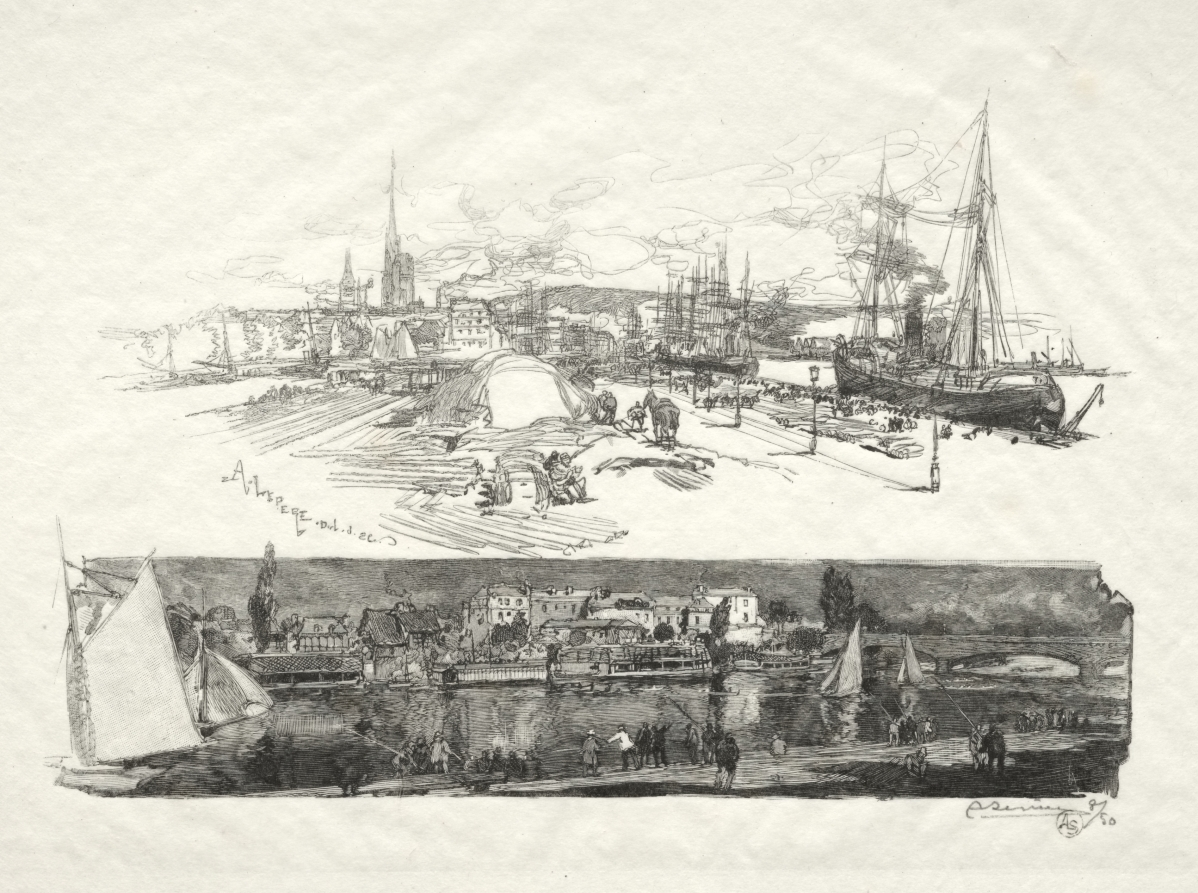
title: Rouen Illustré: Les Nouveaux Quais-L'Ile La Croix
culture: France, 19th century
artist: Auguste Louis Lepère (French, 1849–1918)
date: 1896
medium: wood engraving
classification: Print